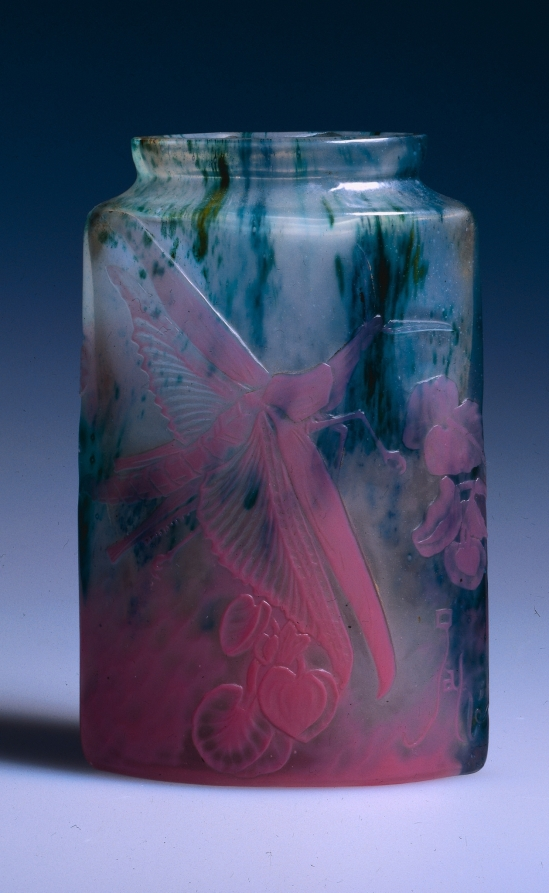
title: Vase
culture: France, early 20th Century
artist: Emile Gallé (French, 1846–1904)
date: c. 1900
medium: glass with pink and green inclusions, cameo cut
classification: Glass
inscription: inscribed in Japanese style, lower right: Gallé.